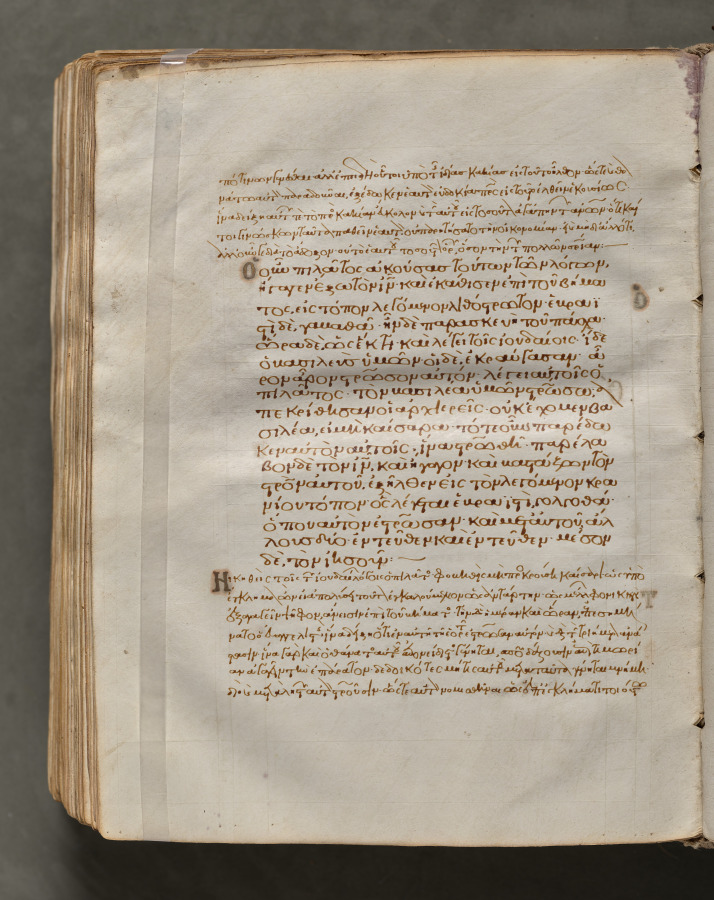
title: Text, folio 413 (verso), from a Gospel Book with Commentaries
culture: Byzantium, Constantinople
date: c. 1000–1100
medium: ink, tempera, and gold on vellum; leather binding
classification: Bound Volume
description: Each of the four gospels in this book opens on a page with brilliantly illuminated borders depicting the author of the text as well as birds—principally peacocks, symbols of the immortality of the soul—and fountains, representing the fountain of life and the salvation of the soul. This volume consists of 428 leaves with texts in Greek. Its level of sophistication suggests that it was probably written and decorated in a monastery in Constantinople.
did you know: Gospel books were carried in procession through Byzantine churches.